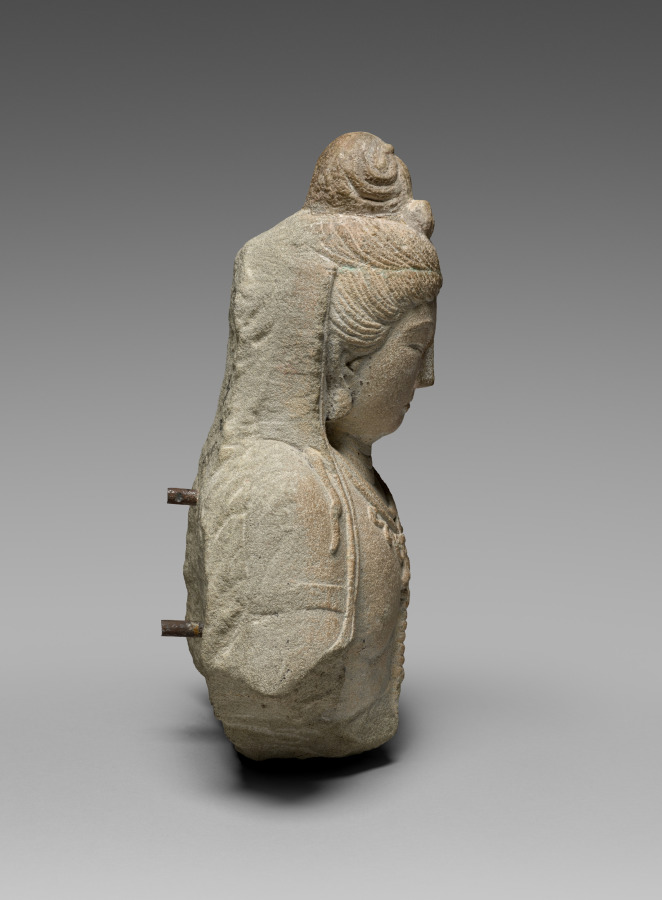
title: Bodhisattva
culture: China, Shanxi province, Taiyuan, Tianlongshan caves, Cave 6, Tang dynasty (618-907)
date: early 700s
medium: light gray limestone with traces of polychromy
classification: Sculpture